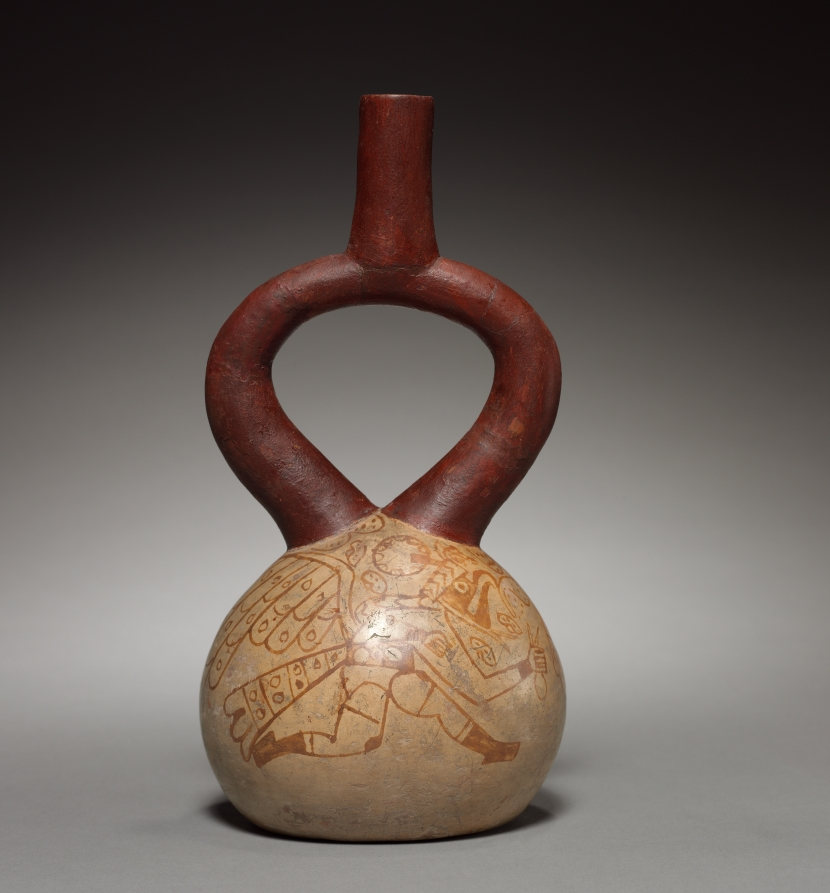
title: Bottle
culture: Peru, Chimú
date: c. 200–400 CE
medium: pottery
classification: Ceramic